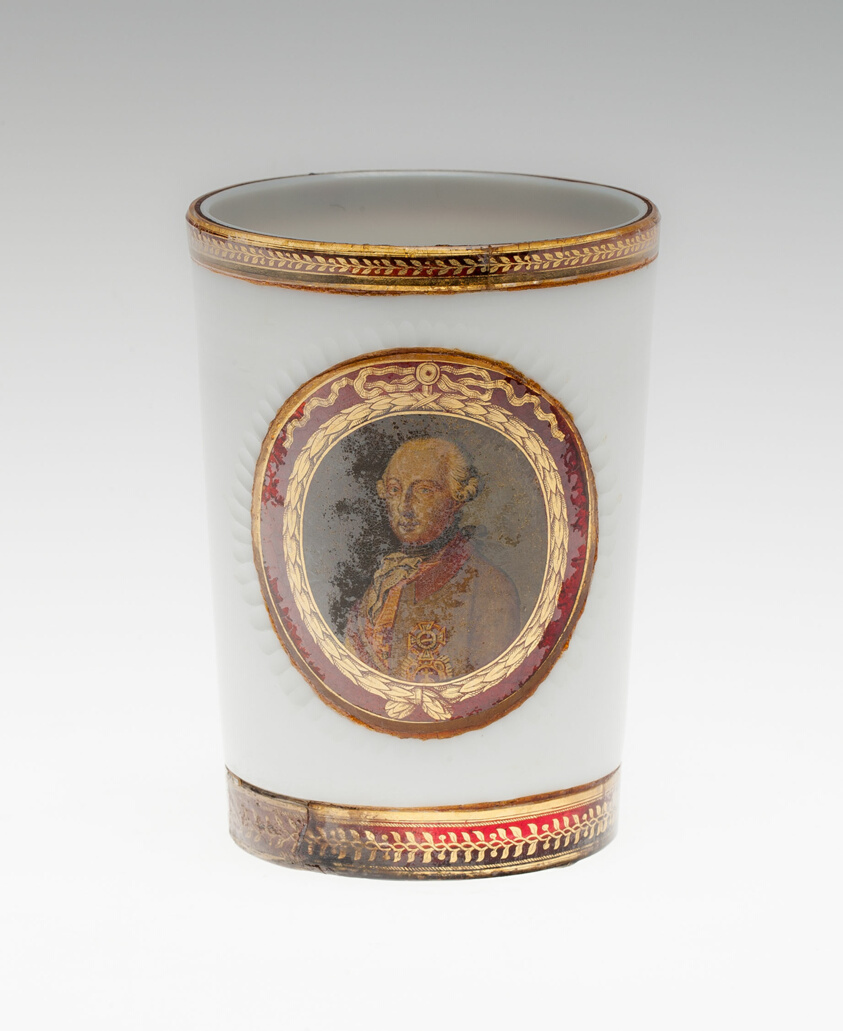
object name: Glass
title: Beaker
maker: Austria, Gutenbrunn; Johann Joseph Mildner (Austrian, 1765-1808)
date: 1787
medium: Glass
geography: Heiligenkreuz-Gutenbrunn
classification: drinking vessel; glass; european decorative arts